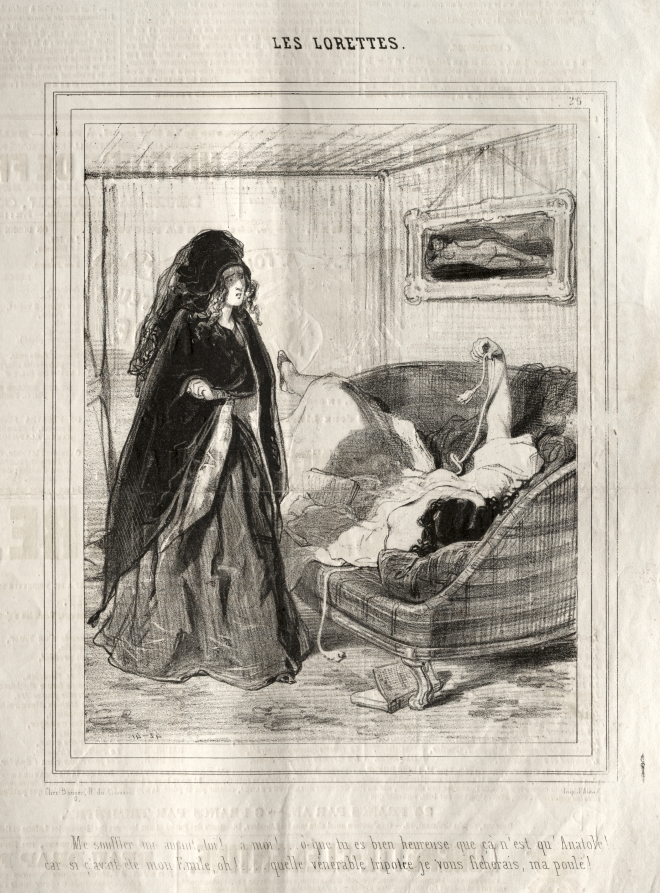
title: Les Lorettes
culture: France, 19th century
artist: Paul Gavarni (French, 1804–1866)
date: 1842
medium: lithograph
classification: Print